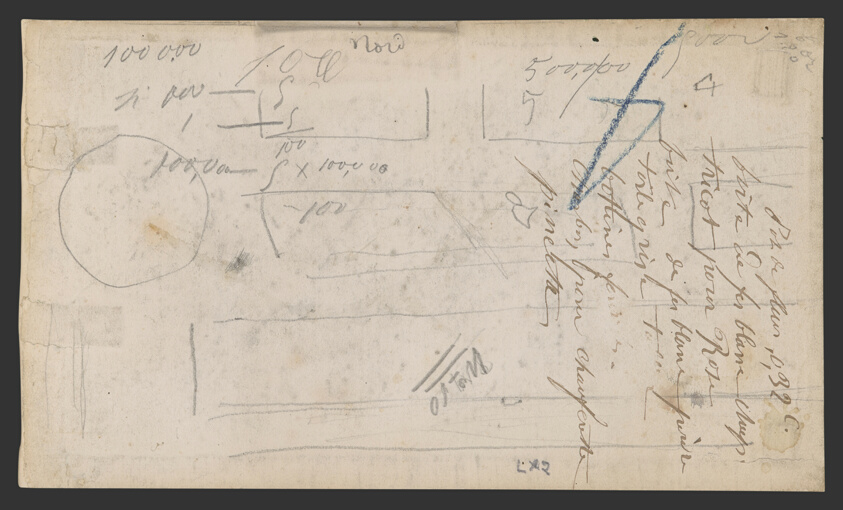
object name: Drawing and Watercolor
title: Sketchbook No. 2 (L'Estaque)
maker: Paul Cézanne; French, 1839-1906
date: 1875–86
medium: Graphite and pen and ink drawings on paper, bound into a book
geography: France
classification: sketchbook; graphite; prints and drawing; paper